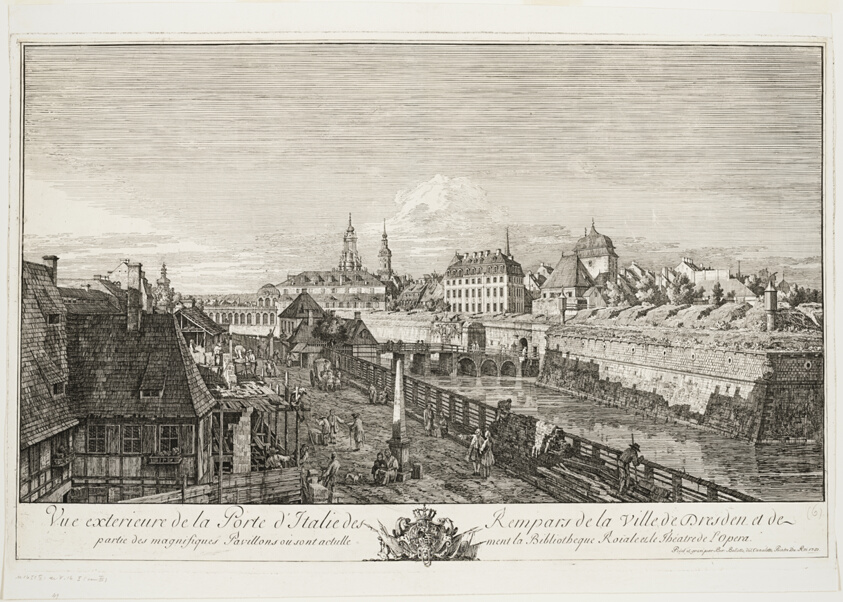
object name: Print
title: Exterior View of the Italian Gate of the Ramparts of the Town of Dresden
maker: Bernardo Bellotto (Italian, 1721-1780)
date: 1750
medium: Etching on ivory laid paper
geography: Italy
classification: etching; paper; print; prints and drawing